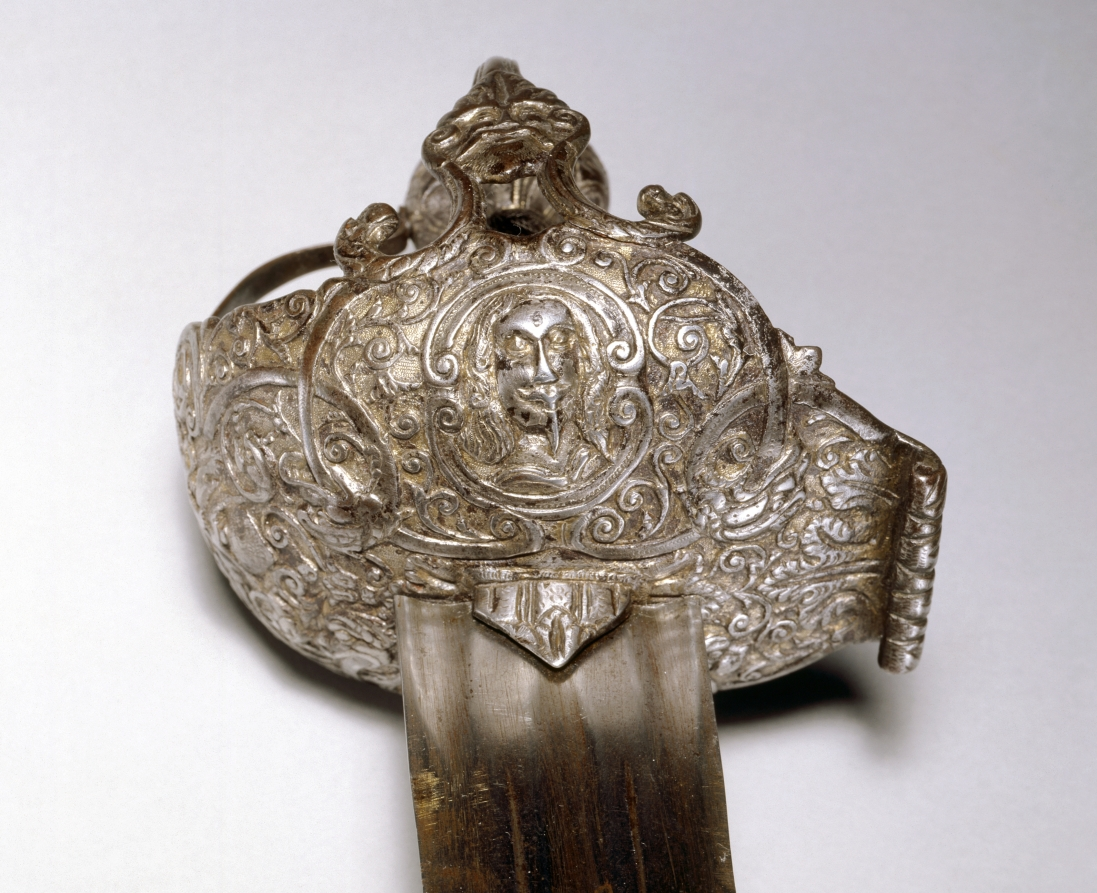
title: Basket-Hilt Broadsword ("Mortuary Sword")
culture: Hilt: England; Blade: Germany, Solingen (?), Hilt: 17th Century; Blade: 18th Century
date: hilt: c. 1640–50; blade: 1700s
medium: steel, chiseled; inlaid gilt- silver foil; wood and wire grip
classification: Arms and Armor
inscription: ANDRIA FERRARA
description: The decoration on this sword's hilt includes an image of King Charles I of England (beheaded in 1649). Because the image resembles the king's death mask, this sword is known as a "mortuary sword." It may have belonged to Sir Thomas Fairfax, a general of the Parliamentary cavalry during the English Civil War (1642-51). Large, double-edged broadswords, designed for heavy cavalry use, were common from the 1600s through the 1800s.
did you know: The ornate basket hilt which protects the hand, is chiseled with leafy decorative scrollwork and grotesque masks.